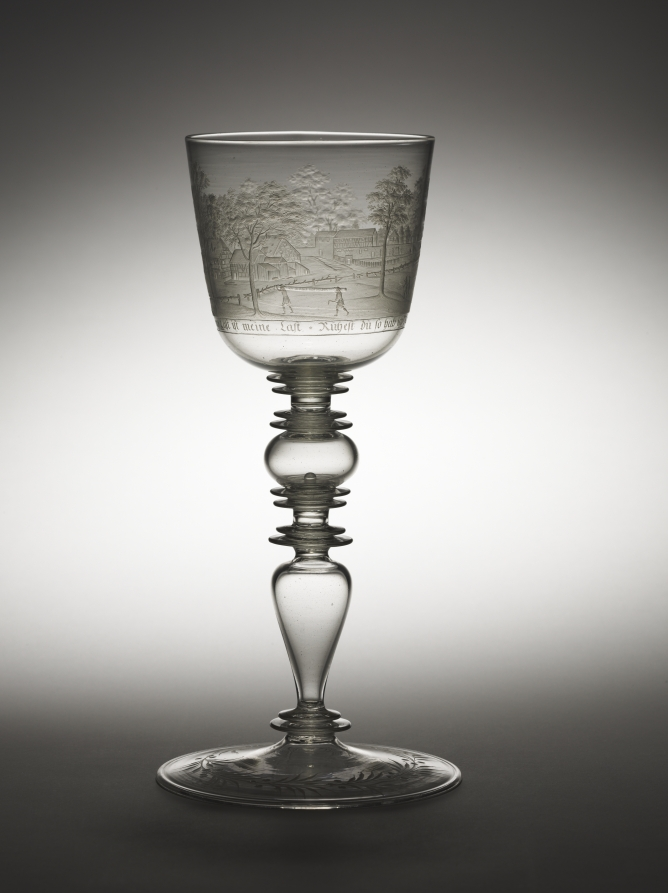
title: Goblet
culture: Bohemia, 17th century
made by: Hermann Schwinger (German, 1640–1683)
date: c. 1680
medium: glass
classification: Glass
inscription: signed and dated. Two inscriptions, one appears on the log held by two men: Es Ruhet auf beiden (It rests on both); the other appears below the scene: Deine Last ist meine Last. Ruhert du so habe ich Rast (Your burden is my burden. It you rest then so have I rest).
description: View of the Panierplatz in Nuremberg, and Allegory.